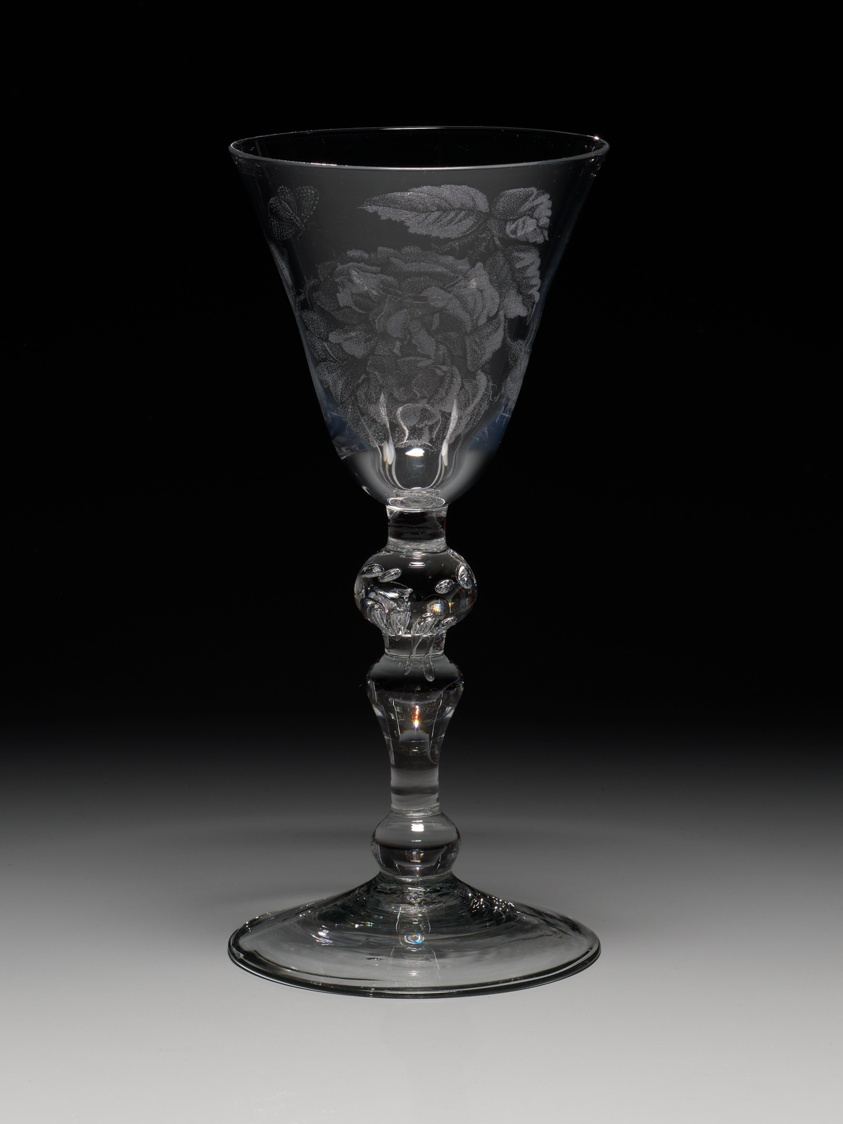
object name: Glass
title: Wine Glass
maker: England or Netherlands, Dordrecht; Engraved by Frans Greenwood (Dutch, born England, 1680–1763)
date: 1749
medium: Glass; blown and stipple engraved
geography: England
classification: drinking vessel; glass; european decorative arts